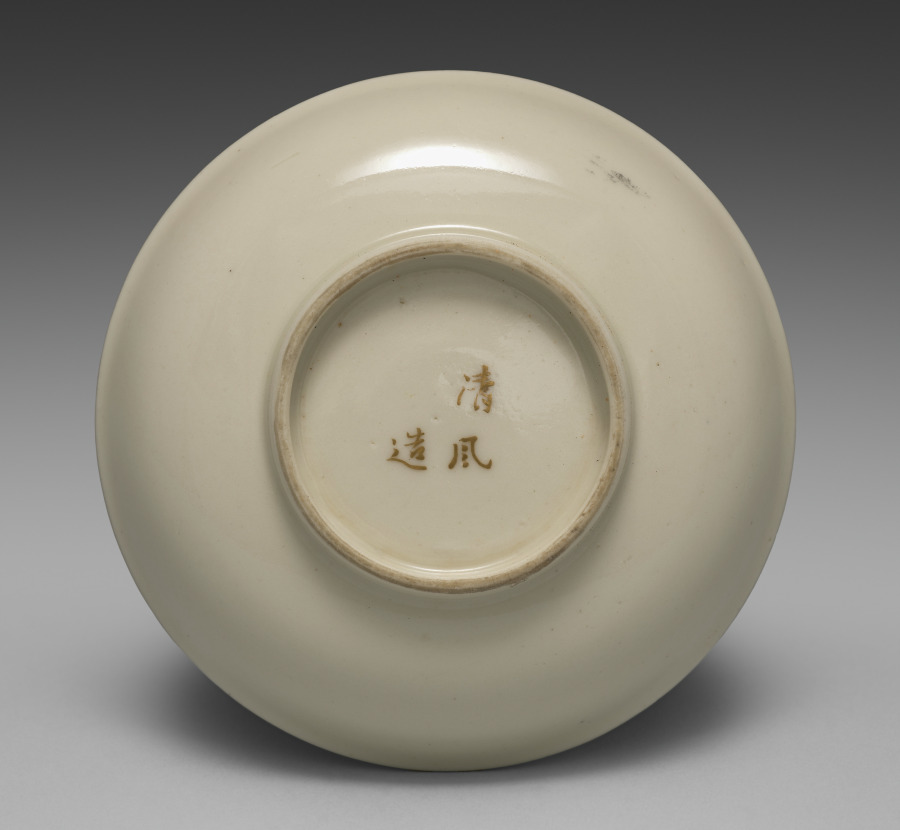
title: Small Dish from Dining Set with Plum Blossoms and Cracked-Ice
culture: Japan, Meiji period (1868–1912)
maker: Seifū Yohei II (Japanese, 1844–1878)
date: c. 1875–78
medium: Porcelain with molded designs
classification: Ceramic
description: Each item in this set has a delicate low-relief design of flowering plum branches over scattered, intersecting lines meant to resemble the cracked-ice surface of a frozen body of water and is signed on the base in gold pigment. While Yohei II produced many fine works in underglaze blue, like those produced by Kiyomizu Shichibei, he also made works in quite different styles later in his career, from the early 1870 s. In 1873, he was appointed purveyor to the Industrial Center of Kyoto Prefecture, a designation associated with Kyoto’s efforts to reach an international market through the port of Kobe; and from 1875 until his death, he was involved in national-level projects to present Japanese ceramics across the world. It was during this period that Yohei III was apprenticed to Yohei II, and it has been suggested that this set may in fact be an early example of Yohei III’s work, which he signed with his teacher’s name. Decorated with flowers resembling Japanese textile motifs, the set calls to mind the design of Yohei II’s pair of vases with plum blossoms in the Victoria and Albert Museum. Here, the elaborate trees created for a formal public exhibition setting have been translated into the approachable blossoms of the genteel domestic environment. While the designs are consistent across the pieces, each raised flower petal and pistil and each incised line in the ice was done by hand, so the cups, bowls, and dishes are similar yet unique. The bottoms of two boxes once identified the set’s owner, but the information has been deliberately obscured with black ink. However, inscriptions still visible appear to indicate two occasions, once at the end of July 1886 , and once again in June 1916 , when parts of the set were requested from Hokura in Niigata Prefecture. The location corresponds to a neighborhood in the present-day city of Jōetsu. The surname Tsuji 辻 also appears on a paper tag affixed to one of the box cloths. Future research may possibly reveal more about their provenance. A vase by Yohei III in a private collection combines the formal grandeur of the Yohei II vases in the Victoria and Albert Museum with the gentler design of this dining set, placing flowering plum trees against soft, scalloped-edge clouds resembling those in golden screens.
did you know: The dining wares have a creamy white coloration that the four boxes containing them identify as Korean in style.